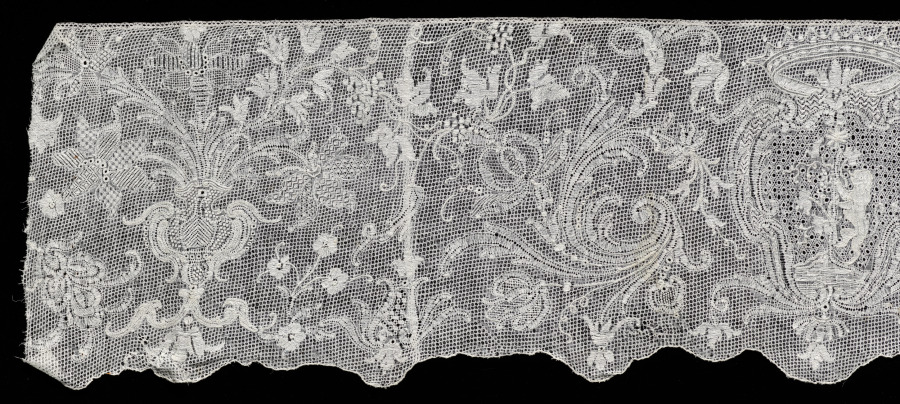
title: Lace Flounce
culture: Belgium, Dinant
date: 1700s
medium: Linen: needle lace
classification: Lace